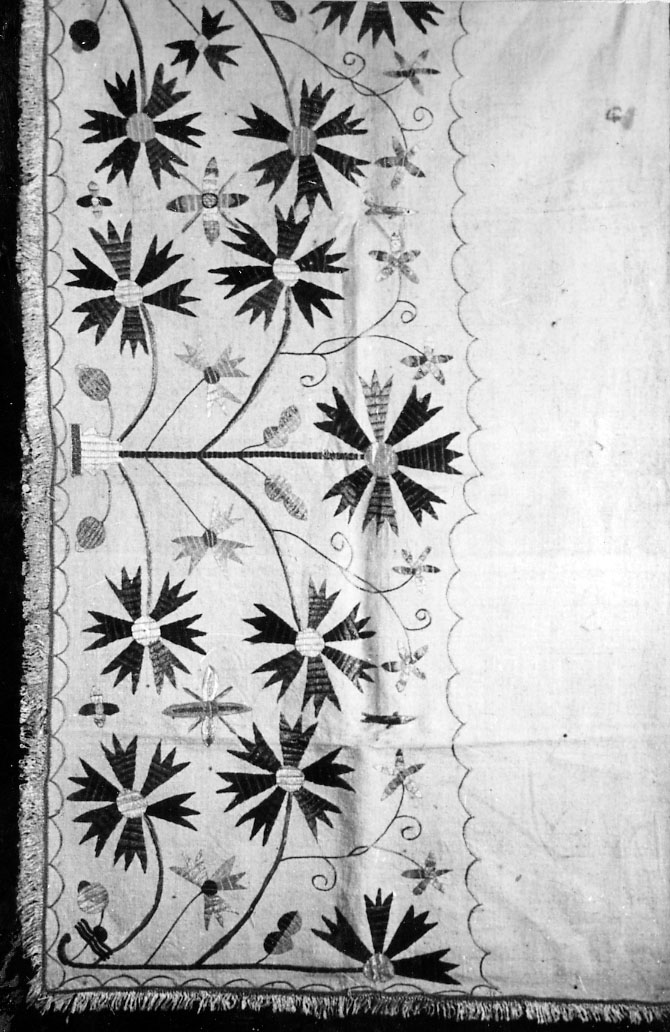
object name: Textile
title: Valance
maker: Spain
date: 19th century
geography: Spain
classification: textile; needlework (visual works)